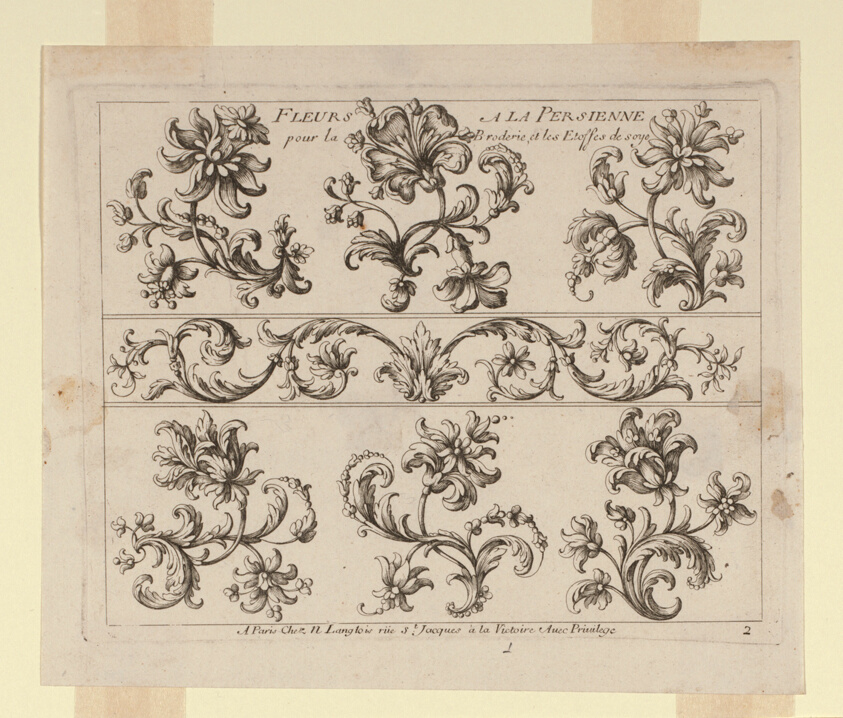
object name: Textile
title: Design for an Embroidered or Woven Textile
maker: France, Paris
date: 17th century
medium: Paper, printed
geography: France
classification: textile; accessory - paper design; accessories (object genre)